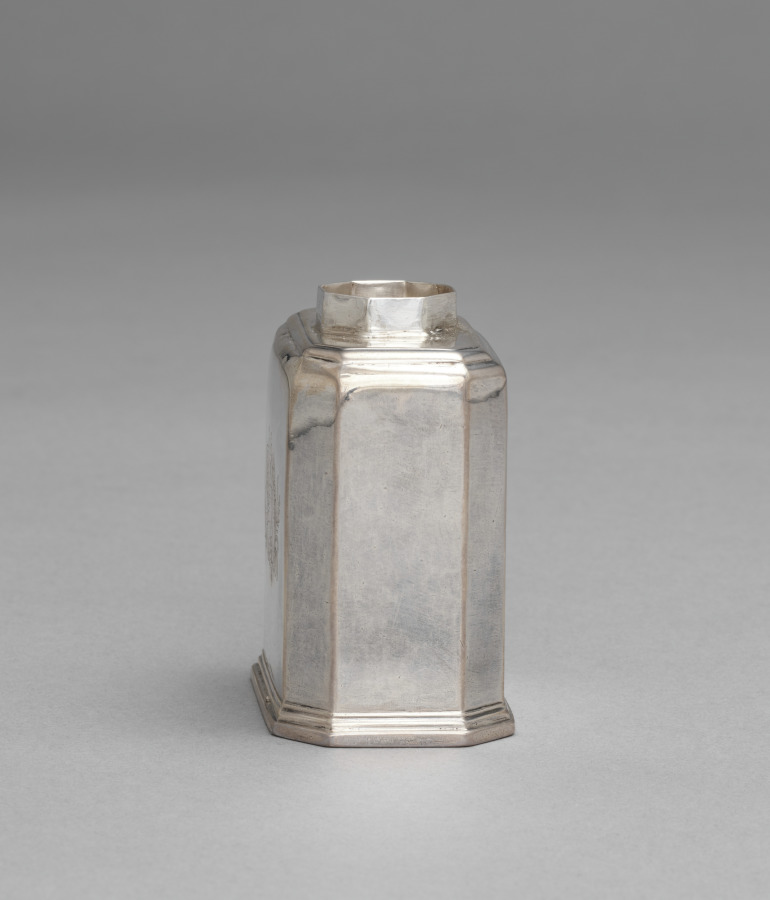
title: Tea Caddy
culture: England, London, 18th century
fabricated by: Thomas Ash (British)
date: 1713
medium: silver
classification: Silver